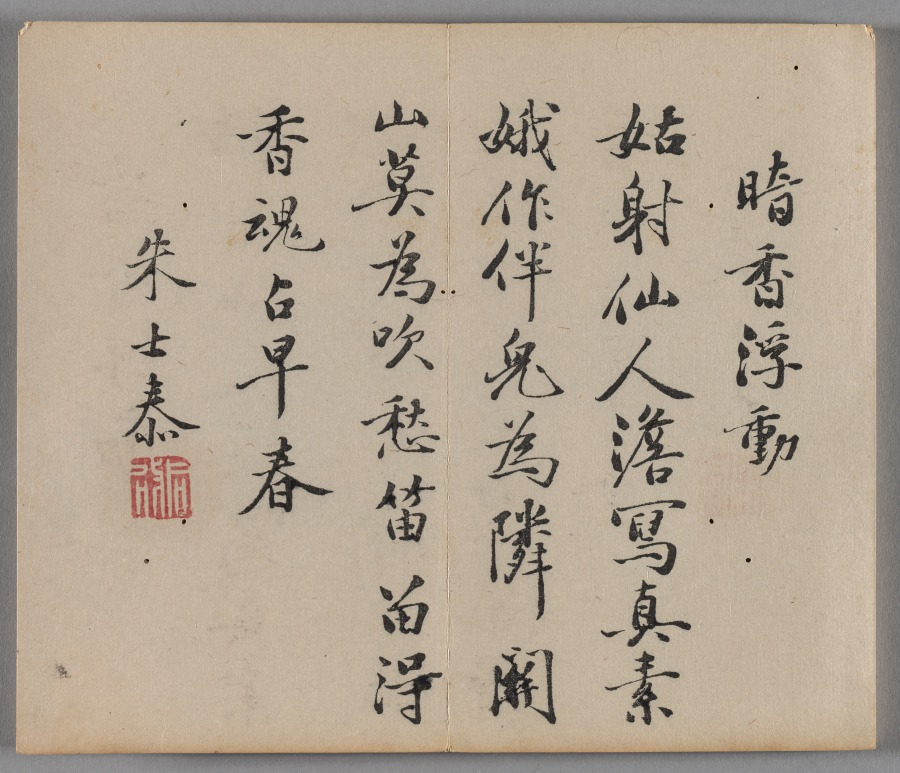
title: Ten Bamboo Studio Painting and Calligraphy Handbook (Shizhuzhai shuhua pu): Plum Blossoms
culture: China, Qing dynasty (1644-1911)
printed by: Hu Zhengyan (Chinese, c. 1584–1674)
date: 1633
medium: Woodblock-printed book; ink and colors on paper; first edition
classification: Print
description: Color printing reached a level of perfection in the early 1600s, as seen in this Ten Bamboo Studio Collection of Calligraphy and Painting and the Mustard Seed Garden Manual of Painting (printed 1679 and 1701). The painterly quality, precision in registering (aligning) the woodblocks, and harmonious colors made them the most successful color print editions in Chinese history. Both editions were printed and compiled in Nanjing, spread nationwide, and had a great impact on the arts in Japan and Korea.